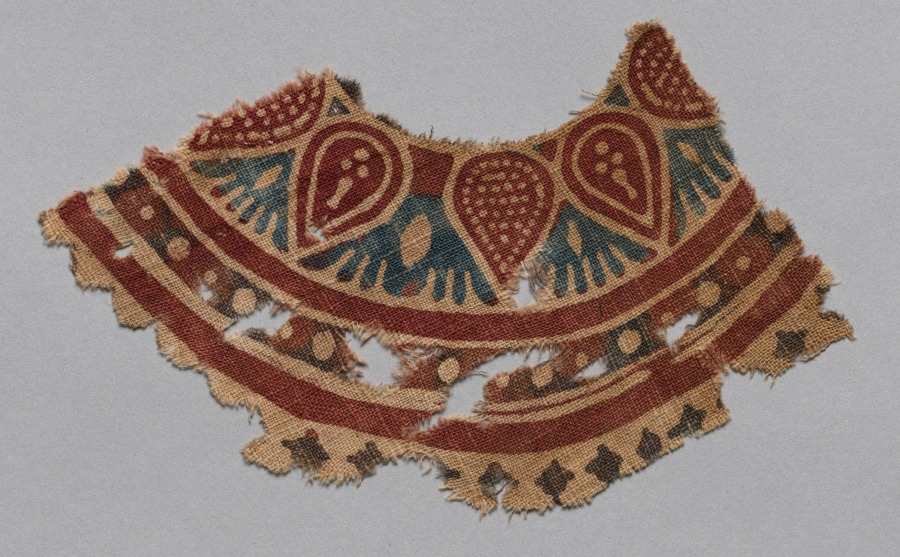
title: Fragment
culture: India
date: 1100s–1300s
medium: Cotton: plain cloth, hand painted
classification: Textile